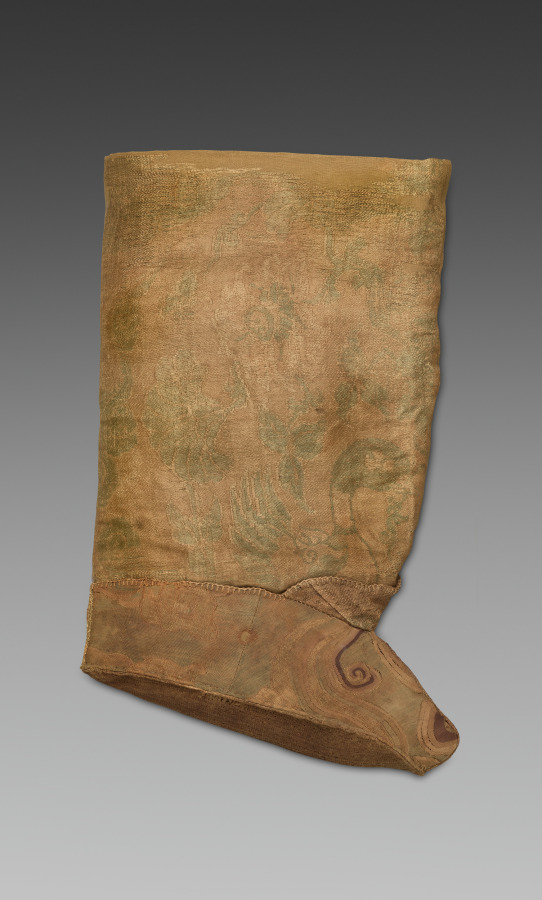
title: Pair of Boots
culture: China, Northern, Liao dynasty (907-1125)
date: 1000–1125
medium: Silk: compound twill; silk and gold: tapestry; silk: tabby, gauze, batting; leather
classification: Garment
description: The fabric and tailoring of garments have always defined social status. For these boots, different outer fabrics were used: a patterned silk for the leg portion, and tapestry (kesi) for the foot. Since both were considered luxury fabrics, they were pieced together from remnants too precious to discard. Consequently, the silk pattern was not used in relation to the form of the boot. By contrast, these boots would have been made for a court official, not a member of the imperial family. The patterned silk was woven with geese flanking a vase of flowers on a stand and surrounded by cloud scrolls. The Chinese motif of flowers arranged in a vase was adopted by the Liao during the 11th century and indicates an 11th- or early 12th-century date for the boots.